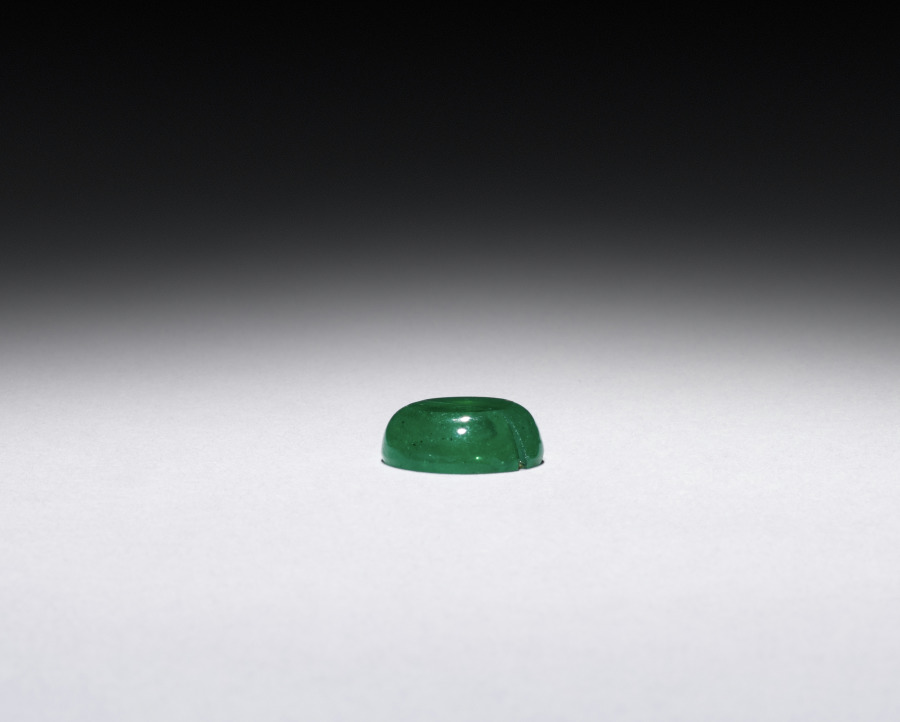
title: Snuff Bottle (stopper)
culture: China, Qing dynasty (1644-1911)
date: 1644–1911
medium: glass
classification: Glass